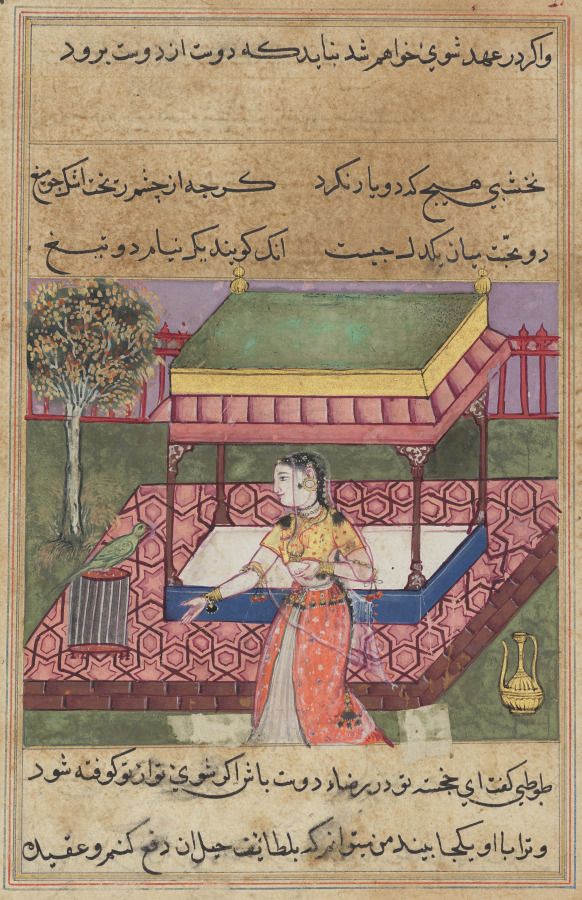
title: The parrot addresses Khujasta at the beginning of the fortieth night, from a Tuti-nama (Tales of a Parrot)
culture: Mughal India, court of Akbar (reigned 1556–1605)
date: c. 1560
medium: gum tempera, ink, and gold on paper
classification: Painting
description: As Khujasta prepares to leave to spend the night with her lover, she is stopped by Tuti the parrot. Tuti begins to tell her the story of a merchant’s wife, named Shahr-Arai, who tricked her husband in order to carry out an affair. The story is set in Nishapur, a city in northeast Iran.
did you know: A highly corrosive copper green pigment, called verdigris, has darkened and damaged the paper.